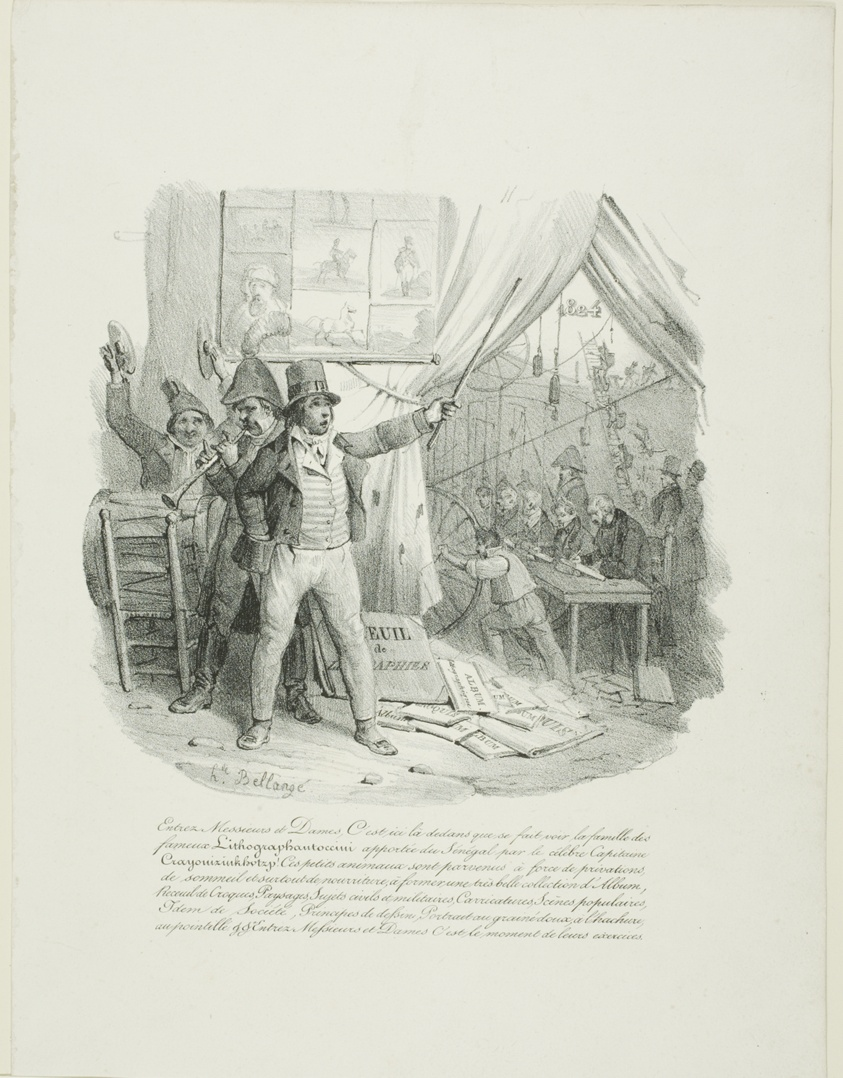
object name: Print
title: Come in, Ladies and Gentlemen, Inside you'll see the Famous Lithographantoccini Family...Frontispiece for "Album of 1824"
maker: Hippolyte Bellangé (French, 1800-1866); François le VIllain (French, c. 1800-1850)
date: 1824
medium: Lithograph in black on white wove paper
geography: France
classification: lithograph; print; prints and drawing